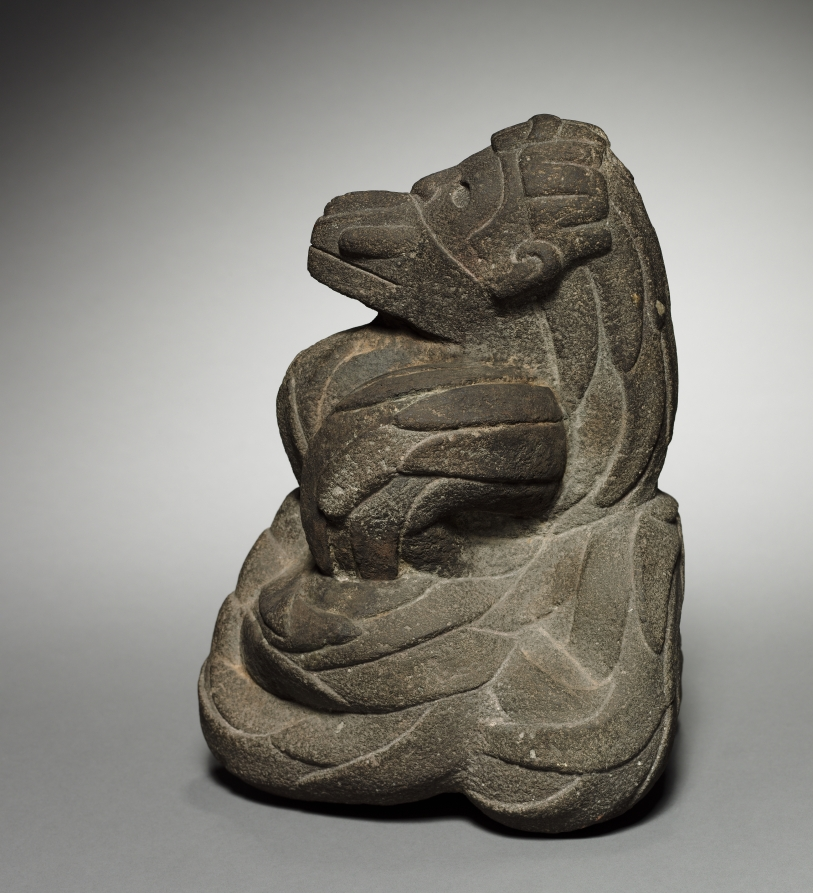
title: Feathered Serpent (Quetzalcoatl)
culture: Central Mexico, Aztec or modern, Post-Classic Period or modern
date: 1325–1521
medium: stone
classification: Stone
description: The museum bought this sculpture in 1941, when study of ancient American arts was in its infancy. It has many odd features, a few perhaps revealing an attempt to make the subject—the Aztec deity Quetzalcoatl (Feathered Serpent)—palatable to modern viewers. But it cannot absolutely be declared fake because some real Aztec sculptures are unusual. Analysis of the surface so far provides no help. Especially odd is the arrangement of the coils into bulges that suggest the pectorals, knees, and buttocks of a human body, as though the sculpture represents a human in a serpent costume. Real Aztec sculpture usually portrays the serpent's dangerous body more realistically. Also, the mouth mask—the insignia of a wind deity related to Quetzalcoatl and, thus, perhaps appropriate—is much larger in genuine sculptures. This suggests that, because the mask and its authentic proportion are strange to our eyes, a forger scaled it down. Other uncommon features include the incomplete carving of the ears, the fact that the human head does not emerge from a serpent's mouth, and more.